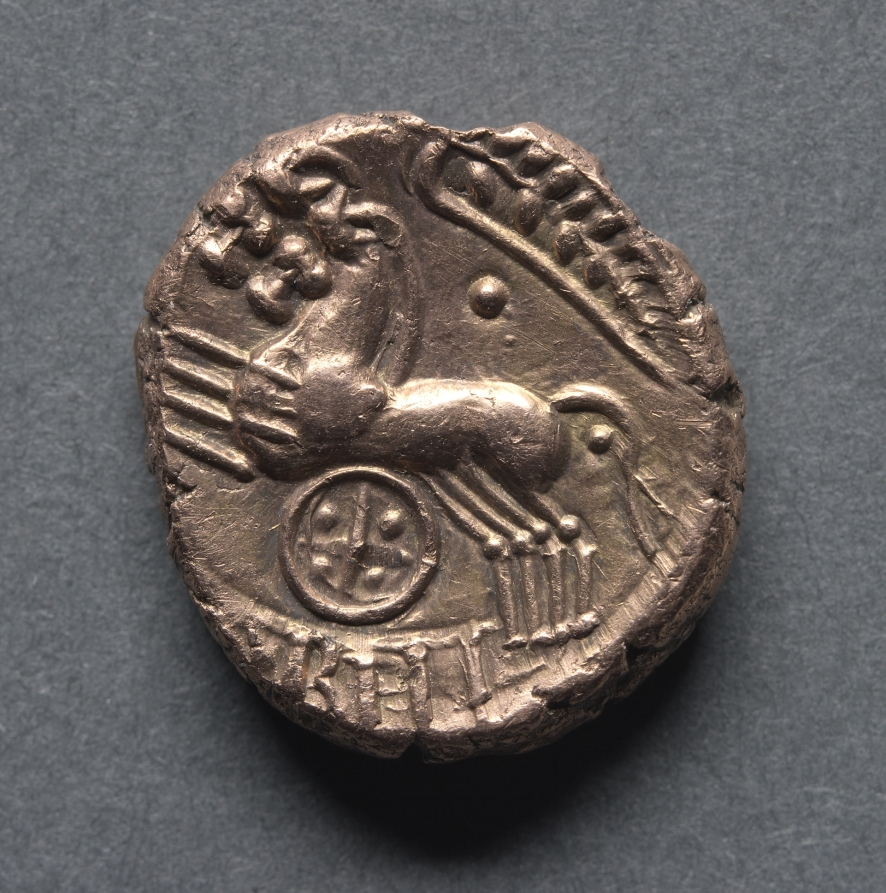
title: Cunobeline Stater: Two Horses and Wheel (reverse)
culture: England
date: c. 10–40 CE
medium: gold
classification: Coins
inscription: [CVNO]BELI[N]